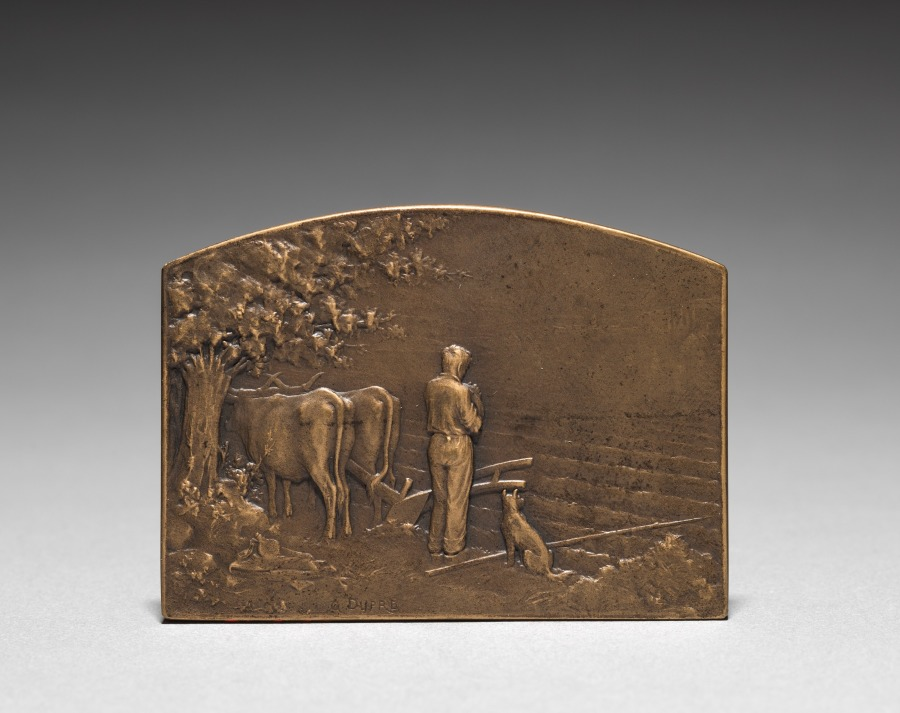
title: Medallion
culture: France, 19th-20th century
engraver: Georges Dupré (French, 1869–1909)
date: 1903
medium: bronze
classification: Metalwork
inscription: "G. Dupré."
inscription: G. Dupré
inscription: C'EST L'ANGELVS QUI TINTE / ET RAPPELLE EN TOVT LIEV / QUE LE MATIN DES JOVRS / ET LE SOIR SONT A DIEV